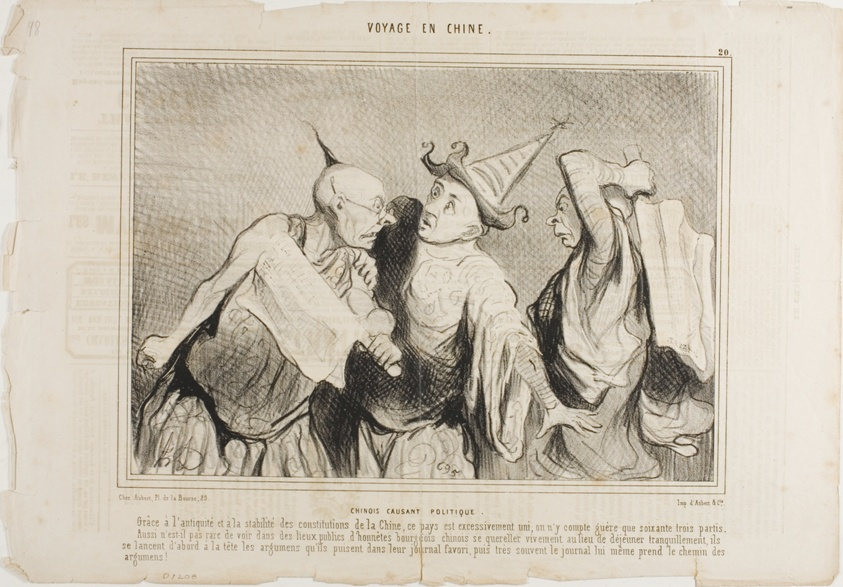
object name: Print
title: Chinese Talking Politics. Thanks to antiquity and the stability of the Constitution of China, this country is extremely unified... it counts only little more than 63 political parties. Quite often one finds Chinese citizens discussing vehemently on public places, using arguments they had prior seen in their favourite journal. Quite often the journal itself will replace the argument, being used as such, plate 20 from Voyage En Chine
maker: Honoré Victorin Daumier; French, 1808-1879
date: published December 18, 1844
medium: Lithograph, with scraping on stone on cream wove paper, with text below and letterpress verso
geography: France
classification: lithograph; print; prints and drawing